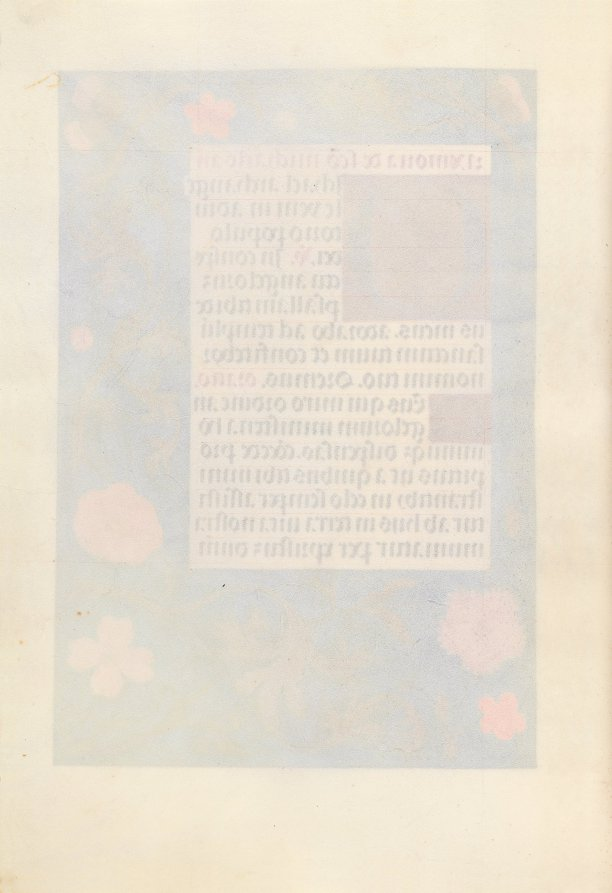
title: Hours of Queen Isabella the Catholic, Queen of Spain: Fol. 168v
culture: Flanders, Ghent and Bruges, late 15th century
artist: Master of the First Prayerbook of Maximillian (Flemish, c. 1444–1519)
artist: and Associates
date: c. 1500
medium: ink, tempera, and gold on vellum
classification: Bound Volume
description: This manuscript was illuminated by a circle of at least five highly organized manuscript painters active in the Flemish cities of Ghent and Bruges. The principal illuminator was Alexander Bening, who painted the majority of the book's miniatures. Manuscripts produced by this circle of artists are renowned for the decoration of their borders, which typically feature a rich variety of realistically-painted flowers, birds, and butterflies. This prayer book, called a book of hours, was intended not for a cleric, but for the private devotions of a lay person-in this case, Isabella the Catholic, Queen of Spain (1451-1504). Isabella's coat of arms embellishes the book's frontispiece. It is unlikely that the book was commissioned by the Queen herself; rather, she probably received it as a diplomatic gift from someone courting her patronage, perhaps Cardinal Francisco Jimenez de Cisneros. A Franciscan friar, Jimenez was dependent upon Isabella for his advancement, first to the post of Queen's confessor in 1492, and then to Archbishop of Toledo in 1495.